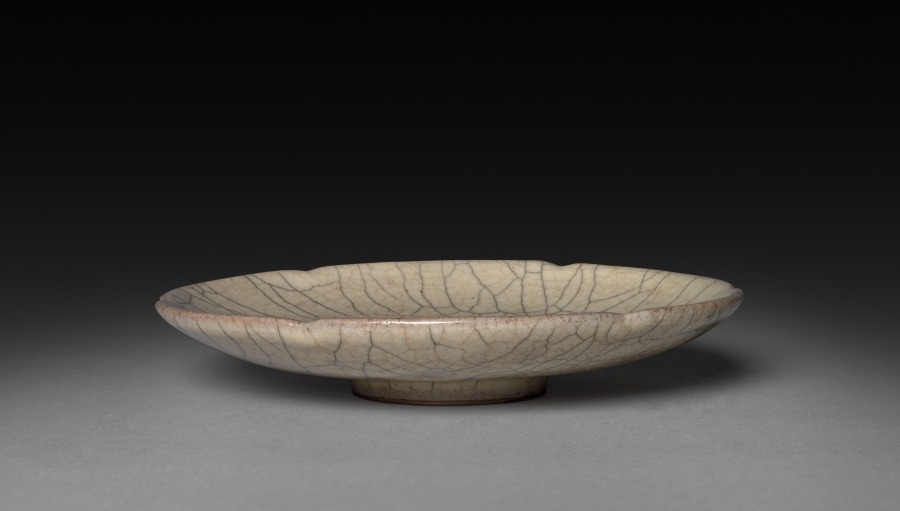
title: Lobed Dish: Guan ware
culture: China, Zhejiang province, Southern Song Dynasty (1127-1279) - Yuan Dynasty (1271-1368)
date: 12th-14th Century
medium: glazed buff stoneware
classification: Ceramic